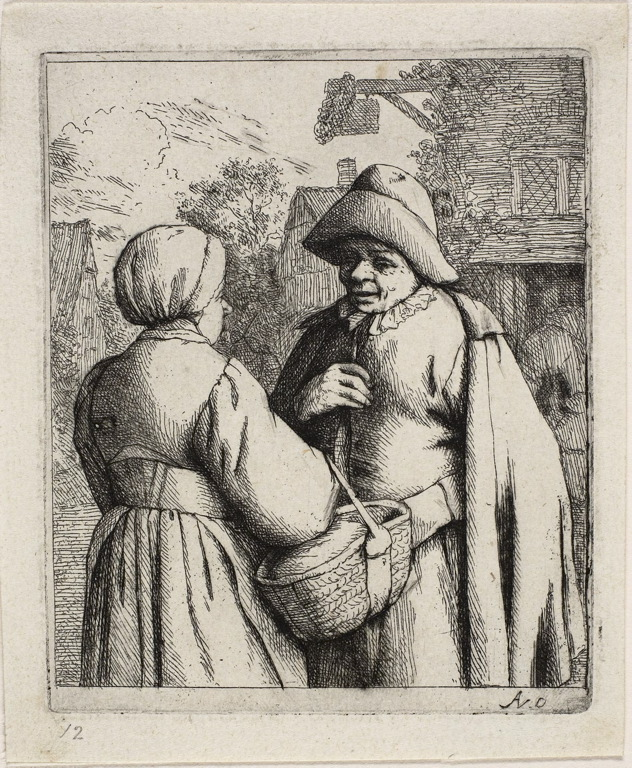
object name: Print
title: Man and Woman Conversing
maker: Adriaen van Ostade (Dutch, 1610-1685)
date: c. 1671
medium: Etching in black on ivory laid paper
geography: Holland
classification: etching; print; prints and drawing